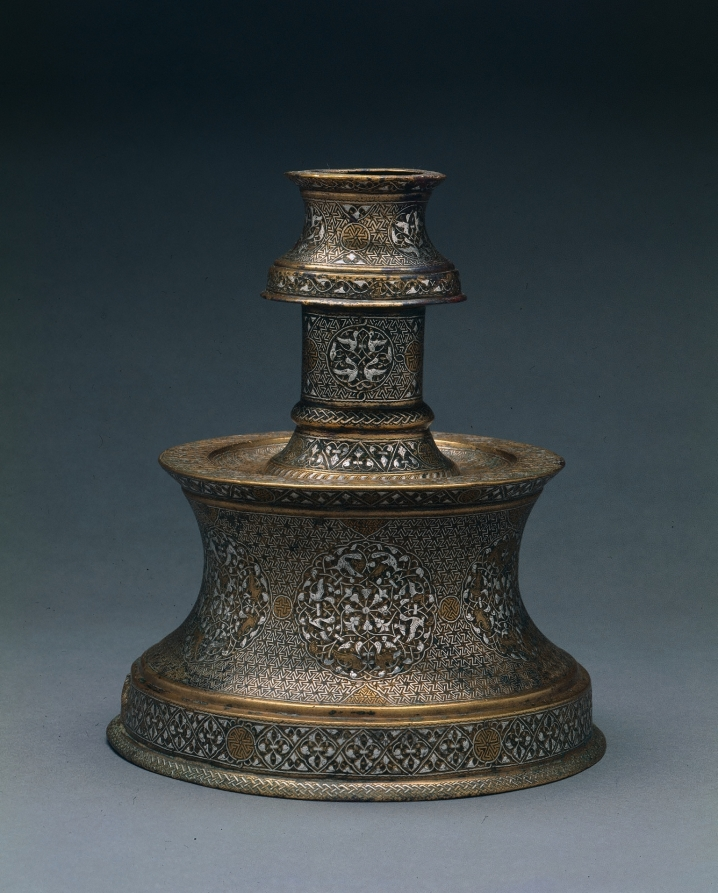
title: Candlestick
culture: Eastern Anatolia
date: 1250–1350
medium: sheet brass inlaid with silver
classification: Metalwork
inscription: none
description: Candlesticks were a common type of luxury good in the Islamic world during the medieval period. The extensive decoration on this piece is arranged in bands with roundels displaying birds in flight and leaf-like scrolls on a background of hexagonal swastikas. These ancient motifs are thought to have been sun symbols and were sometimes used as a background pattern for metalwork at this time.